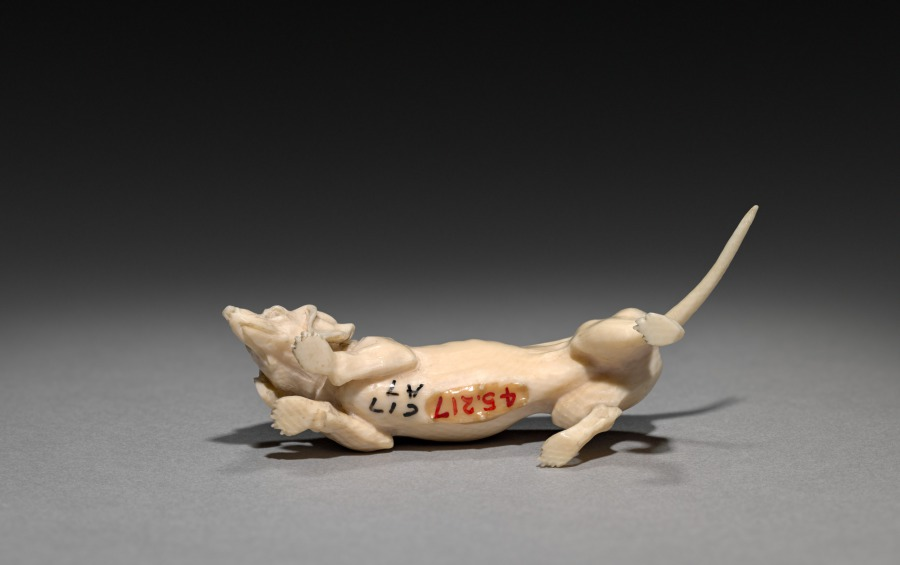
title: Dachsund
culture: Japan, Meiji period (1868–1912)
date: early 1900s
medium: ivory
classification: Ivory